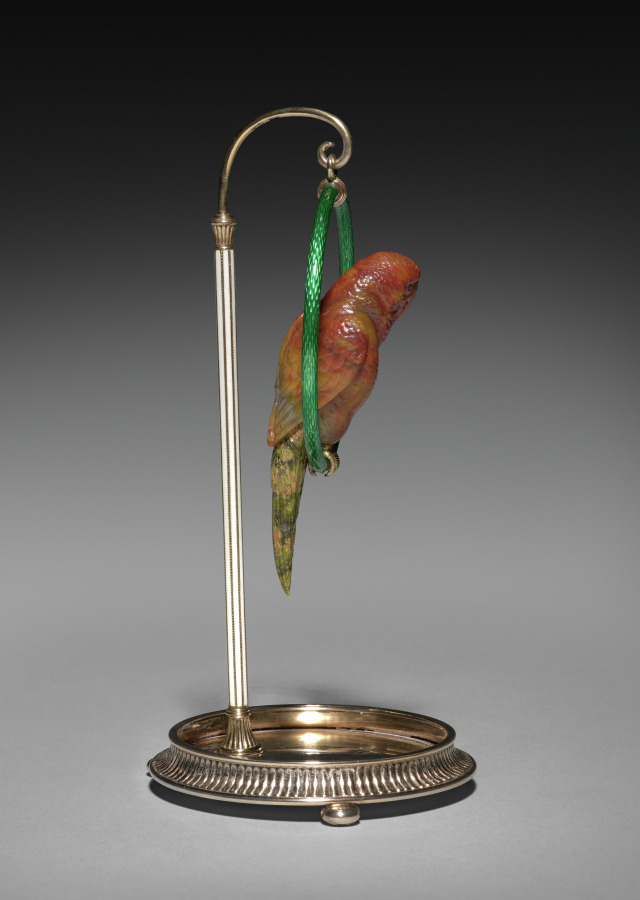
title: Parrot on a Perch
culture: Russia, St. Petersburg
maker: House of Fabergé (Russian, 1842–1918)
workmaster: Mikhail Evlampievich Perkhin (Russian, 1860–1903)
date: 1896–1903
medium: silver, enamel, jasper, agate, emeralds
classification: Miscellaneous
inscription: 88, Kokoshnik, tester's initials (in Cyrillic) [assay mark for St. Petersburg, 1896-1908]; initials of workmaster Mikhail Perkhin (in Cyrillic); Fabergé (in Cyrillic); 6817 scratched.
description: In creating luxurious accessories for a desk or tabletop, Fabergé often used native hardstones such as multicolored agate and jasper, green nephrite, pink rhodonite, and rock crystal found in the Ural Mountains of western Russia. By paying careful attention to the unique colors and textures of the stones, Fabergé and his craftsmen brought them to life, turning milky agate into a begging poodle or green and black jasper into this parrot sitting on a perch. The use of native materials also promoted Russian nationalism, which appealed greatly to the tsar and his family.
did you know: Tsar Nicholas and his cousins in the British royal family kept parrots and parakeets throughout their many palaces.